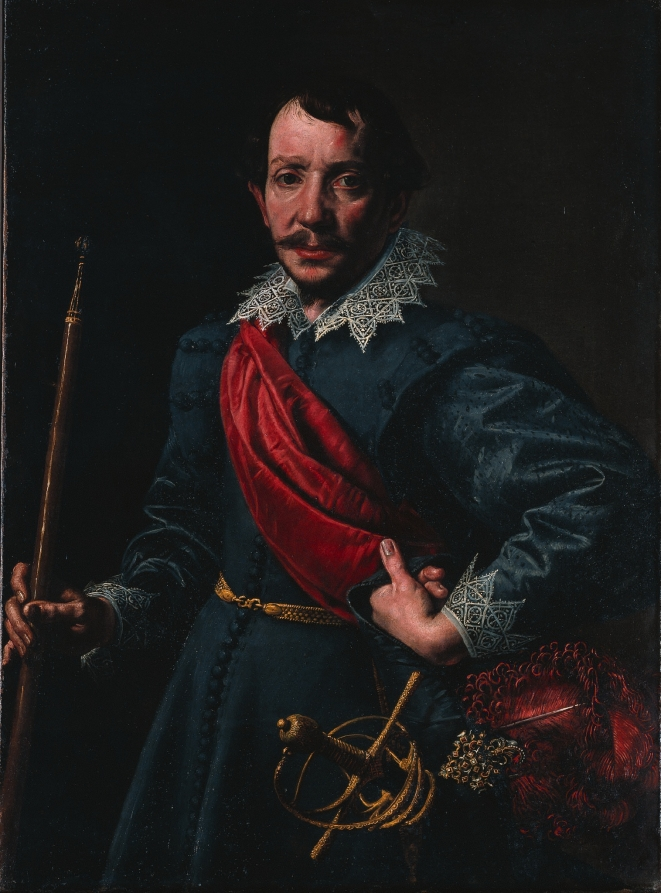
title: Portrait of a Man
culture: Italy, 17th century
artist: Tanzio da Varallo (Italian, c. 1575/80–1635)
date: c. 1620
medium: oil on canvas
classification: Painting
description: This portrait of an unknown man includes a detailed representation of a rapier, a sword worn with civilian dress and used in duels. On the basis of style, the rapier in this painting belonged to a distinctive group of sword hilts decorated between about 1570 and 1600. It was probably made in northern Italy.The son of a Piedmontese architect, Tanzio spent most of his life in northern Italy, but worked briefly in Rome and southern Italy, mainly Naples. These trips brought him under the influence of Caravaggio, whose dramatic realism Tanzio integrated into his own elegant, decorative style.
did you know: Dashing accessories enliven this portrait, including a rapier with an elegantly spiraling guard, produced exclusively in North Italy between 1570 and 1600.